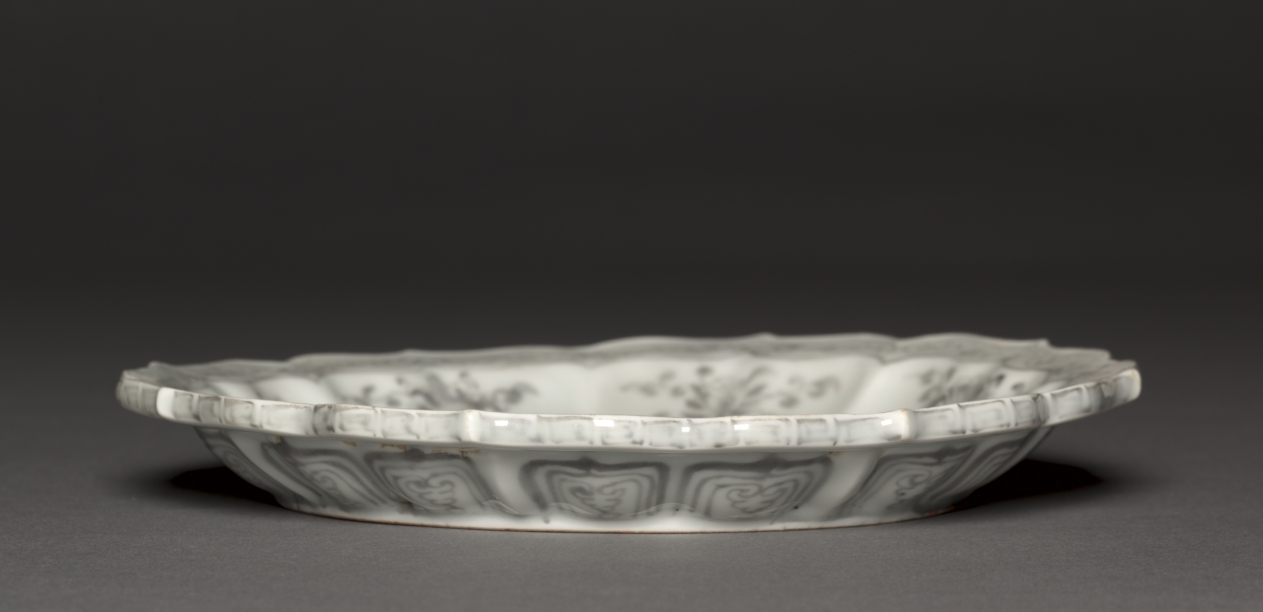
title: Cupstand with Floral Scrolls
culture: China, Ming dynasty (1368-1644), Hongwu reign (1368-1398)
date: 1368–1398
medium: porcelain painted in underglaze red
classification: Ceramic